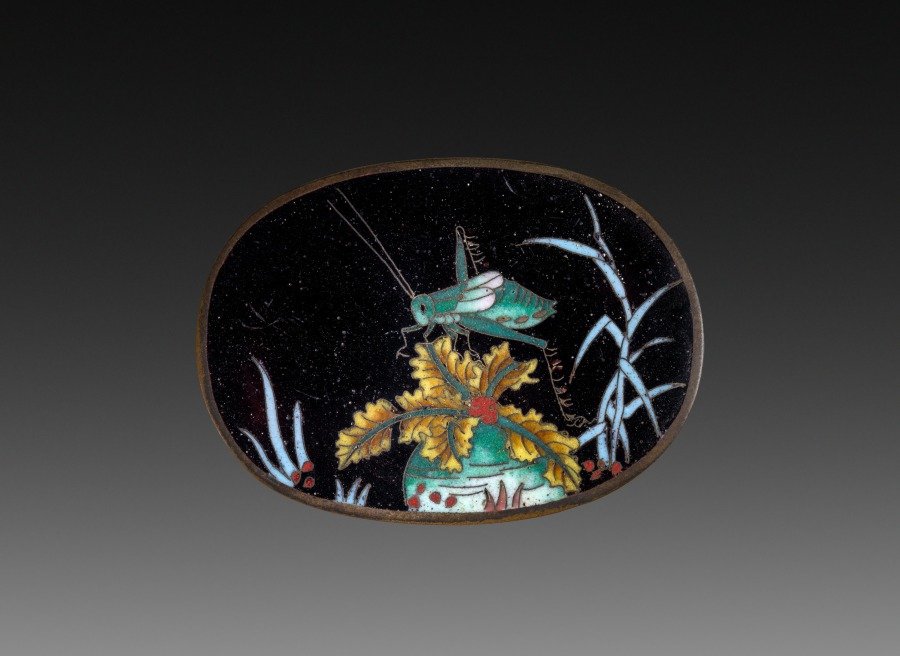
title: Belt Buckle with Cricket on Radish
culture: Japan, Meiji period (1868–1912) to Taishō period (1912–26)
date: early 1900s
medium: cloisonne enamel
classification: Enamel